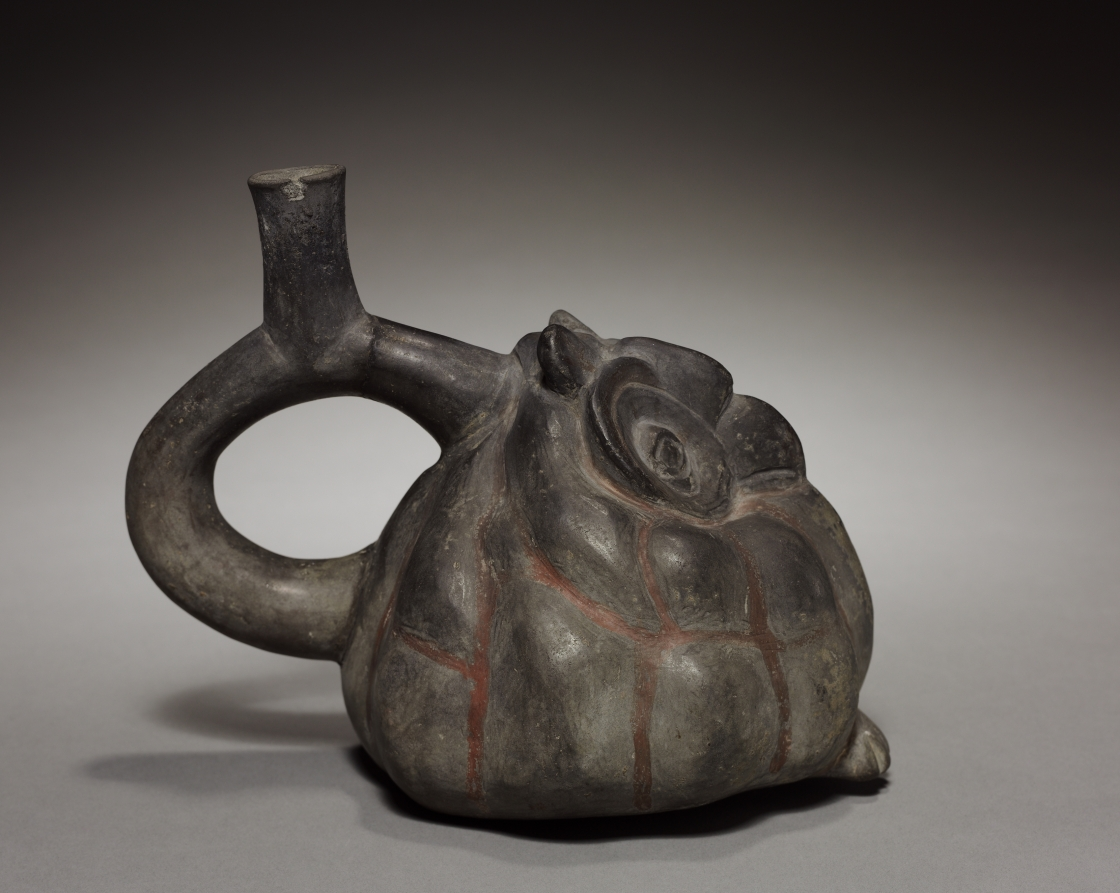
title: Bottle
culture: Peru, Chimú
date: 900–1470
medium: black ware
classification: Ceramic